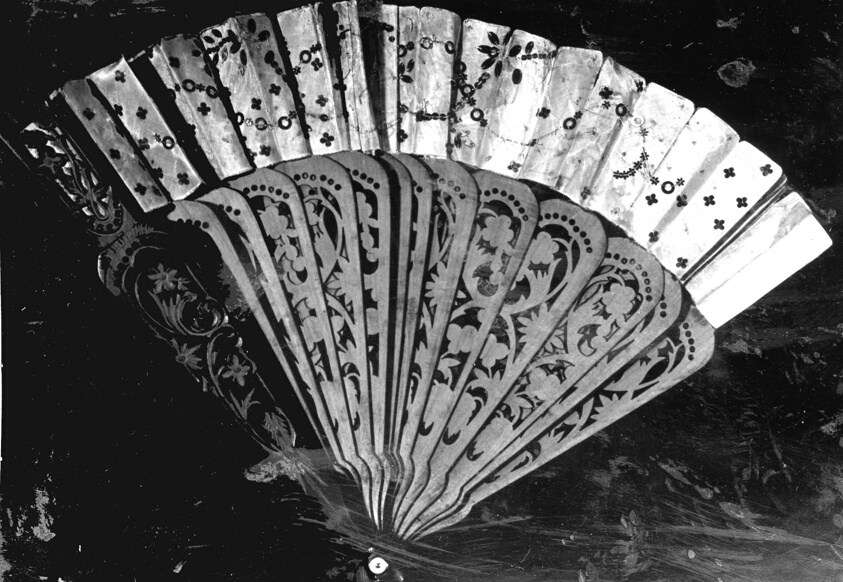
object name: Costume and Accessories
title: Fan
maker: France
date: 19th century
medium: Silver spangled mount (white silk); carved sandalwood sticks; pearl rivet; gilt loop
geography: France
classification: textile; fan - needlework; costume accessory - folding fan; costume accessory; costume